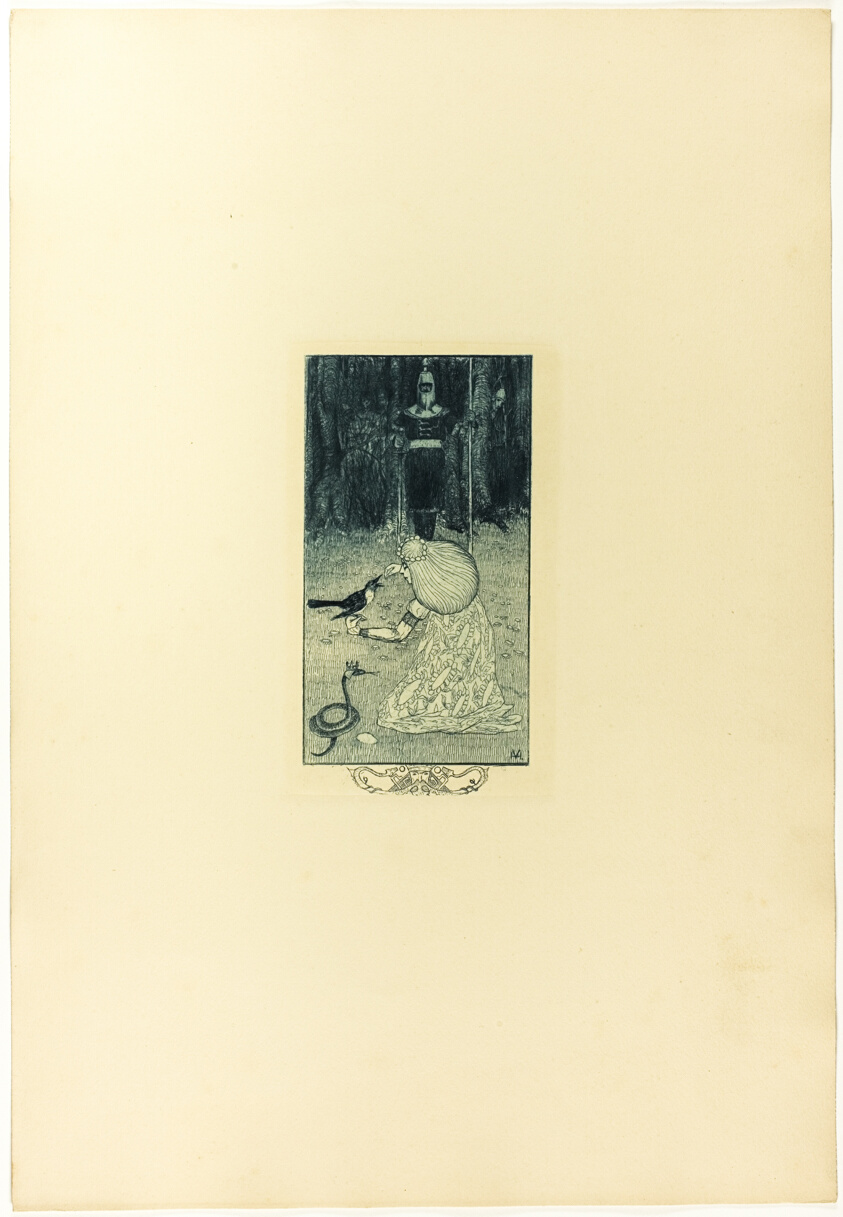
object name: Print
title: The Snake Bride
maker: Heinrich Johann Vogeler; German, 1872- 1942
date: 1895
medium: Etching with blue ink on cream wove paper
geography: Germany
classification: etching; prints and drawing; print; portfolio